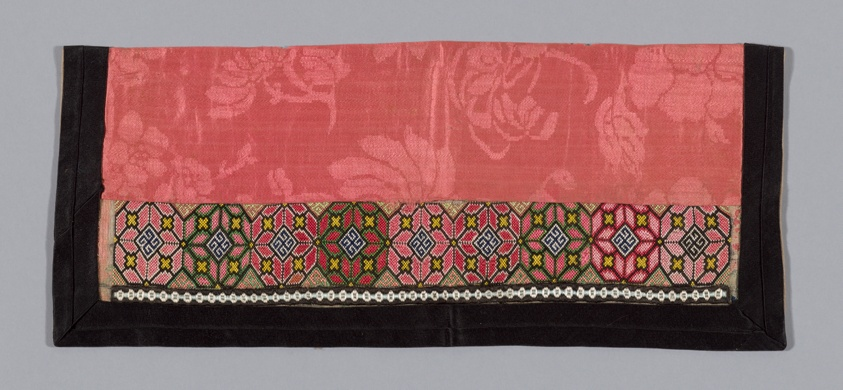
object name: Costume and Accessories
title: Band (for Woman's Trousers)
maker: China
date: 1875/1900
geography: China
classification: costume - needlework; needlework (visual works); costume